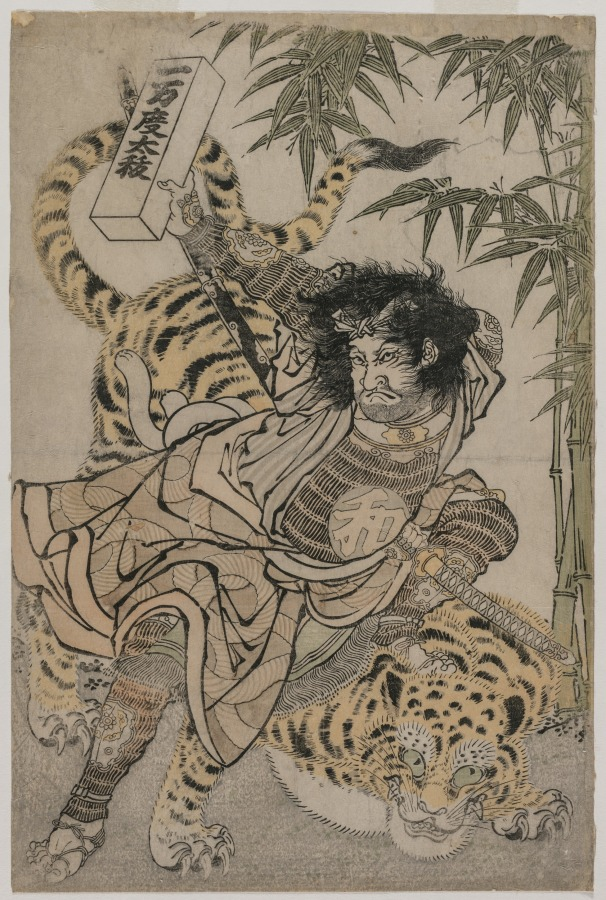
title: Watonai and the Tiger in the Bamboo Grove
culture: Japan, Edo period (1615–1868)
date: c. 1780s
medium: color woodblock print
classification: Print